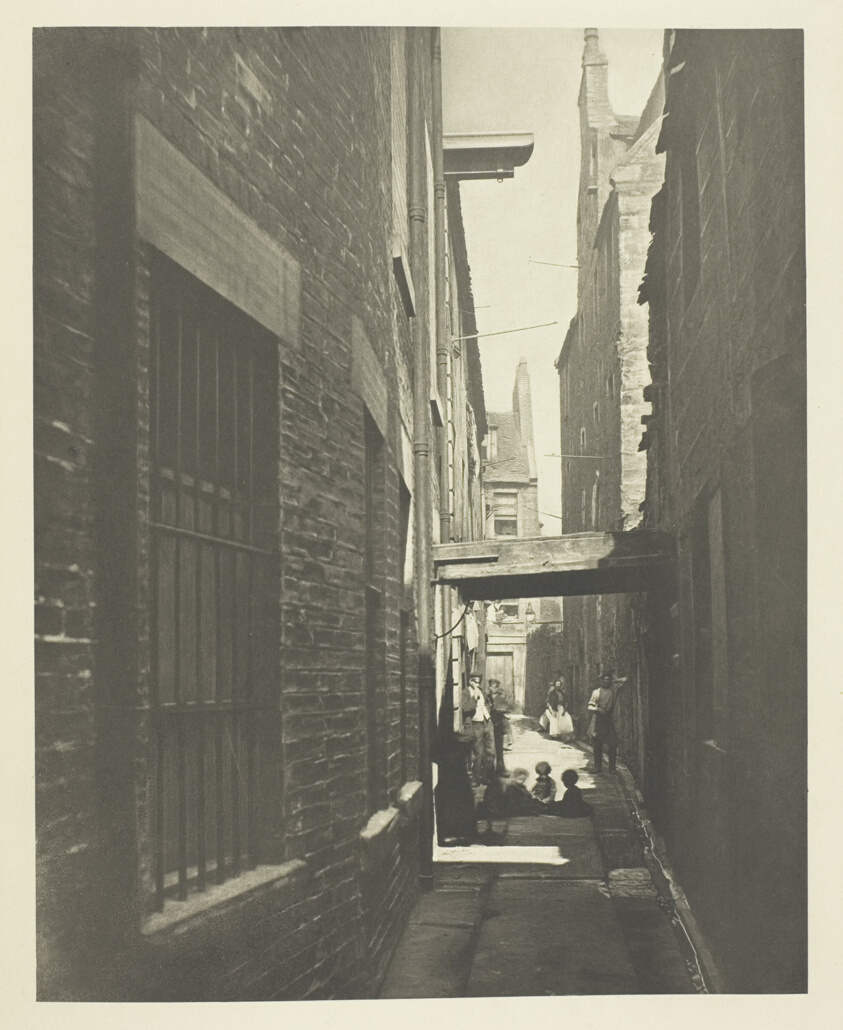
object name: Photograph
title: Close No. 29 Gallowgate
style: 19th century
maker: Thomas Annan (Scottish, 1829–1887)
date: 1868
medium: Photogravure, plate 21 from the book "The Old Closes & Streets of Glasgow" (1900)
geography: Scotland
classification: photograph; photography